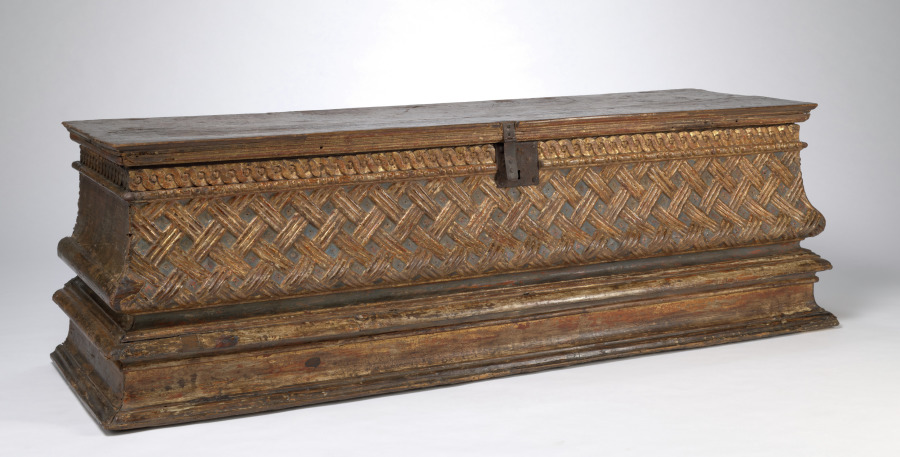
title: Cassone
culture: Italy, early 16th century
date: early 1500s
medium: walnut, painted and gilded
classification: Furniture and woodwork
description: Chests such as this were made in pairs and presented to young women on the occasion of their marriage. They not only provided storage space in the home for clothing and personal effects, but could also be used as a bench to sit on. It was not uncommon for any one room in a Renaissance palace to have several. This chest was in Savoy Castle, near Verzuolo, in the Piedmont region of northern Italy from the 1500s until 1922..